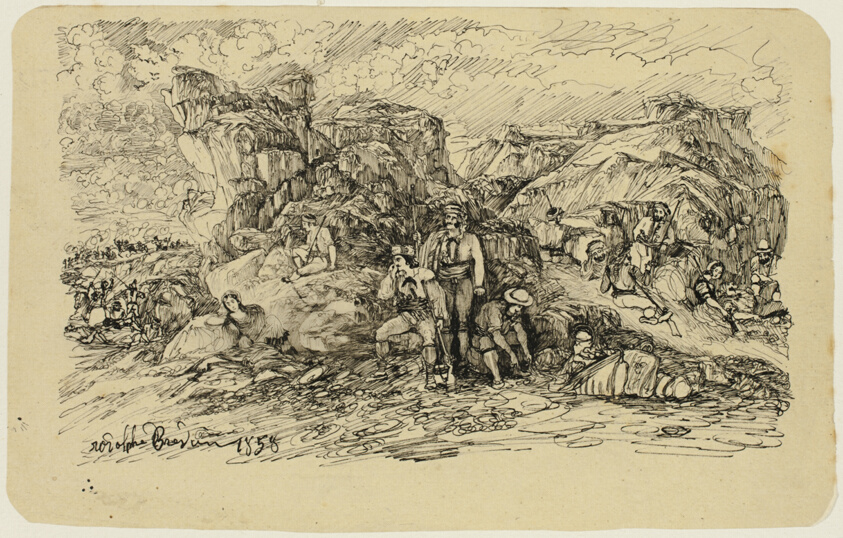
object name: Drawing and Watercolor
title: The Smugglers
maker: Rodolphe Bresdin (French, 1825-1885)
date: 1858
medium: Pen and black ink, on cream wove paper, laid down on ivory wove paper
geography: France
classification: pen and ink drawings; drawings (visual works); prints and drawing